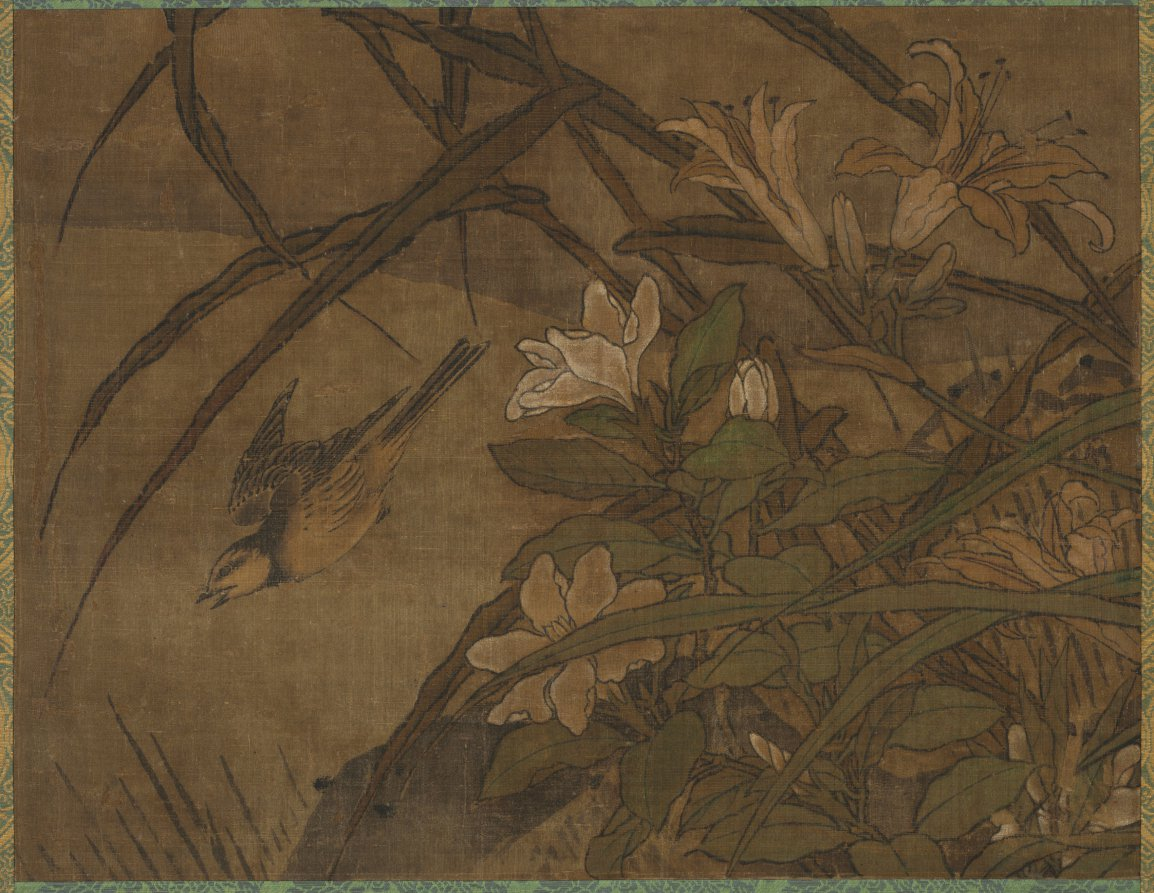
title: Birds and Flowers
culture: Japan, Muromachi period (1392–1573)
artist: attributed to Sesshū Tōyō (Japanese, 1420–1506)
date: mid-1400s-early 1500s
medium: Hanging scroll from a triptych; ink and color on silk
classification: Painting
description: This is one of two paintings possibly by Sesshū Tōyō. They once flanked a central scroll with an ink landscape. The unbalanced nature of the compositions, however, suggests they may be images recycled from larger paintings. The one with sweet osmanthus and hibiscus is an autumn scene, the other is a summer scene with daylilies and gardenias. Folding screens often contrast two seasons or depict all four across a single pair of screens. Sesshū’s works were sufficiently prized that repurposing them in fragmentary form to display in an alcove of a luxurious room would not be an unusual choice.